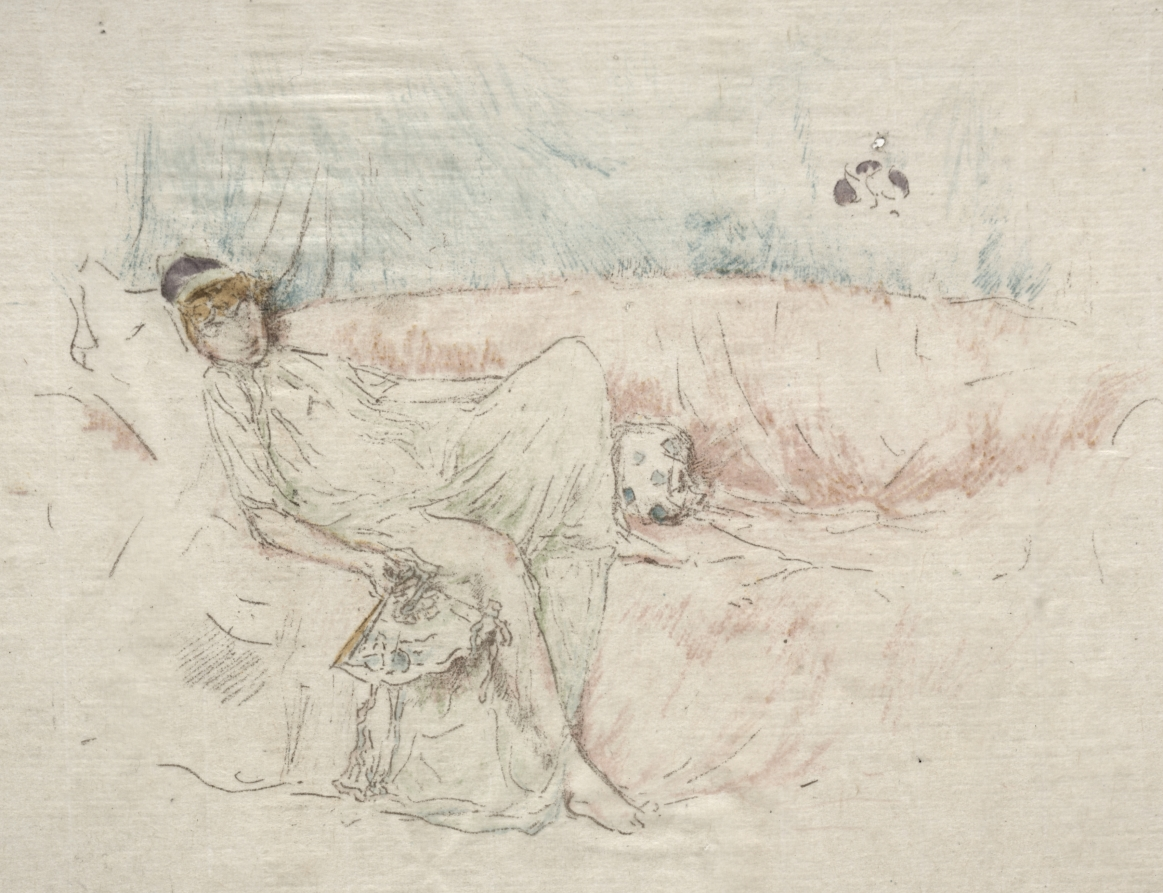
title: Draped Figure Reclining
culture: America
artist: James McNeill Whistler (American, 1834–1903)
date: 1892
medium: lithograph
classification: Print